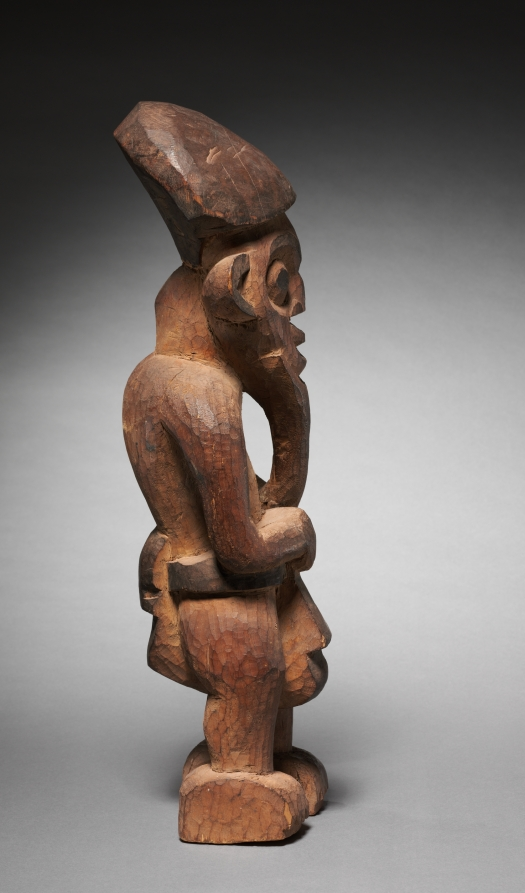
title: Royal Retainer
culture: Equatorial Africa, Cameroon, Bamum, early 20th century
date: early 1900s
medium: wood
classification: Sculpture